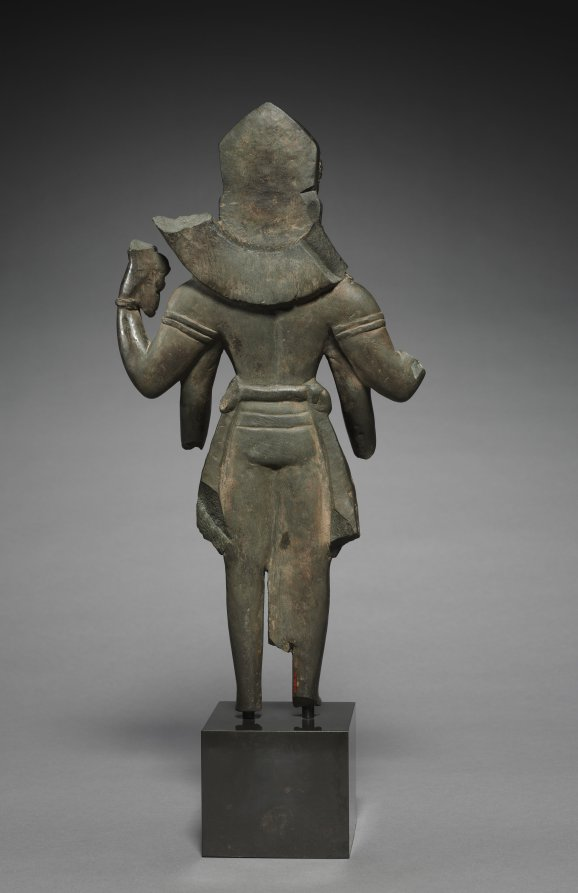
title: Vishnu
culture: Nepal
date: 800s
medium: schist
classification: Sculpture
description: The axial stance and somber expression visually amplify the powerful nature of this four-armed Hindu god. The crown and fine textiles communicate his regal qualities. In his upper left hand, a conch shell signals the start of battle or the sound of OM at the opening of a mantra recited to quell inner demons. Vishnu’s followers glorify his ability to destroy demonic forces that bring imbalance and disorder, both throughout the world and within oneself.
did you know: The dark stone was highly polished and once gleamed like bronze.